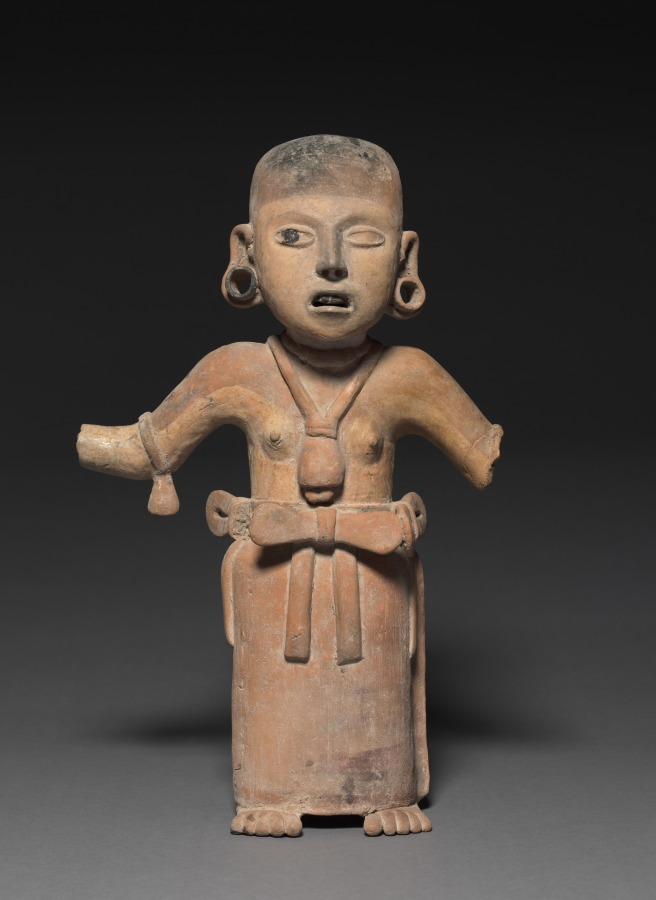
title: Pair of Female Figures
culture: Mexico, Southern Veracruz, Limon, Remojades Monumental Sculpture type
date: 200–500 CE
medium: pottery with burnished buff slip and asphalt paint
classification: Sculpture